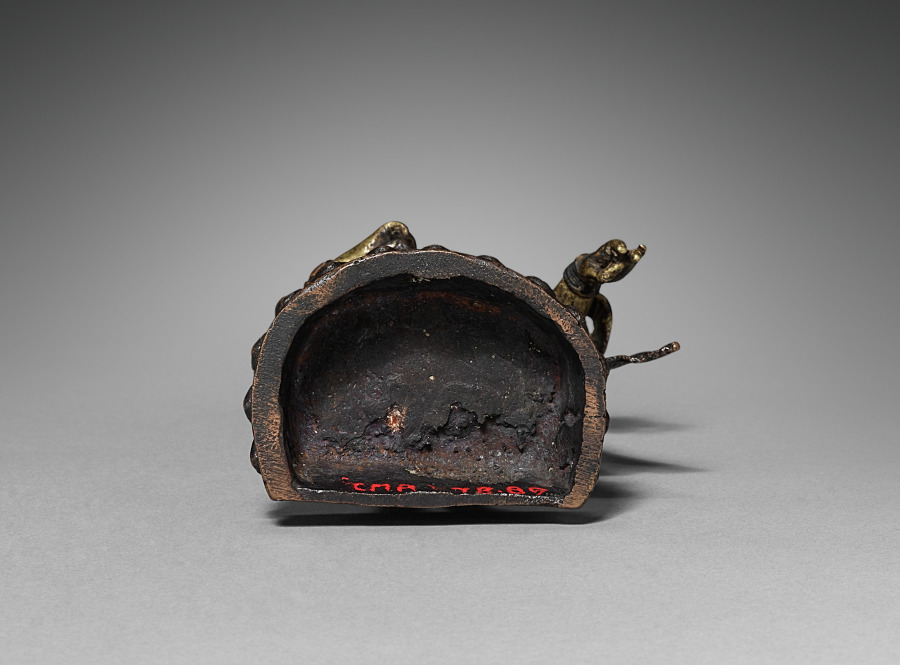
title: Royal Female Donor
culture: Nepal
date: c. 1500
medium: bronze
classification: Sculpture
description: Carrying a lamp in one hand, this female figure draped in finery was probably included as the donor of a sculptural group. She wears a complex headdress consisting of a network of beads and plaques joined together, ending in a bell at her forehead and crowning a long cloth that reaches to her waist. Her position on a lotus flower may indicate the transcendent state she attained as a result of the karmic merit of her donation.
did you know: The pleated skirt tied with a scarf around her waist is characteristic of Nepal.